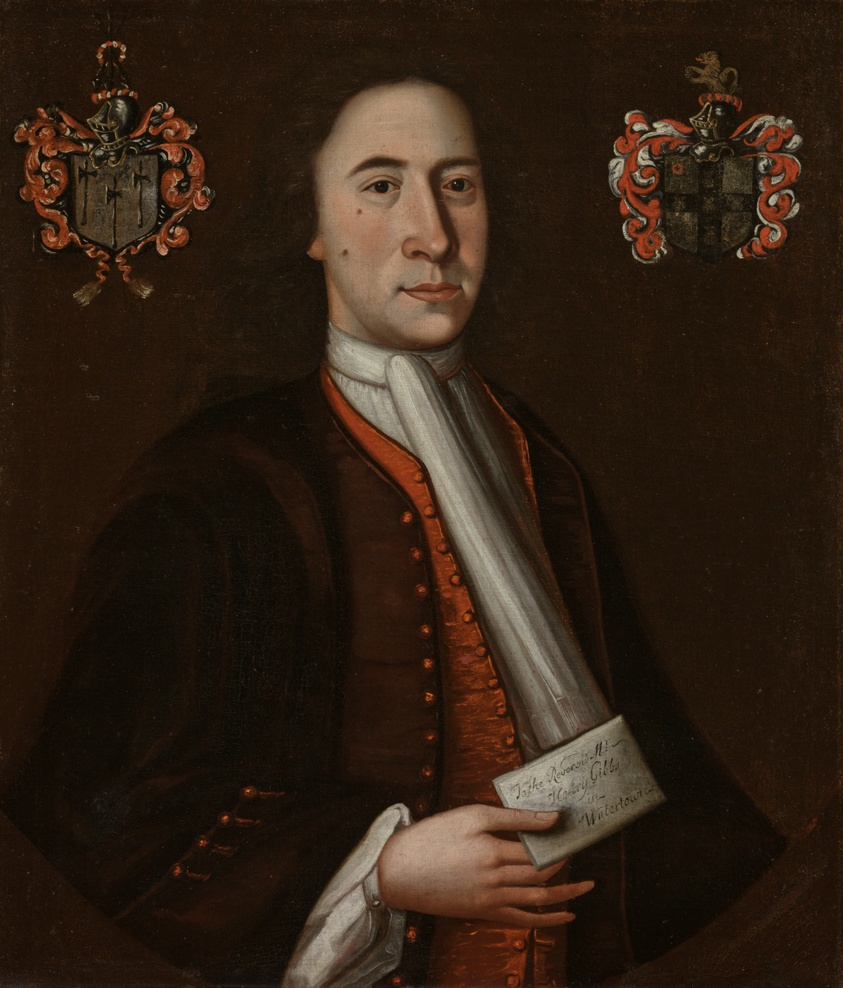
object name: Painting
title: Henry Gibbs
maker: Artist unknown (American, 17th–18th century)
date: c. 1721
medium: Oil on canvas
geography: Massachusetts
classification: painting; american arts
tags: fashion, people, portraits